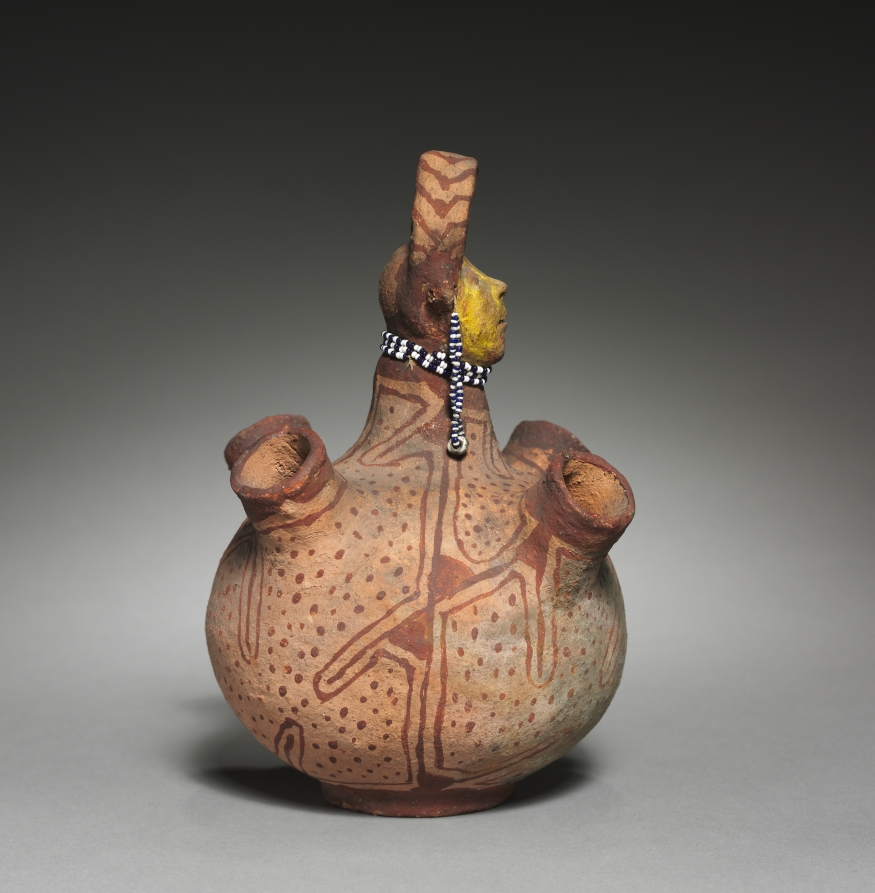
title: Vessel with Four Spouts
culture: Great Basin, Pueblo, Mojave, Post-Contact Period, early 19th century?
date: early 1800s?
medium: ceramic, pigment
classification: Ceramic